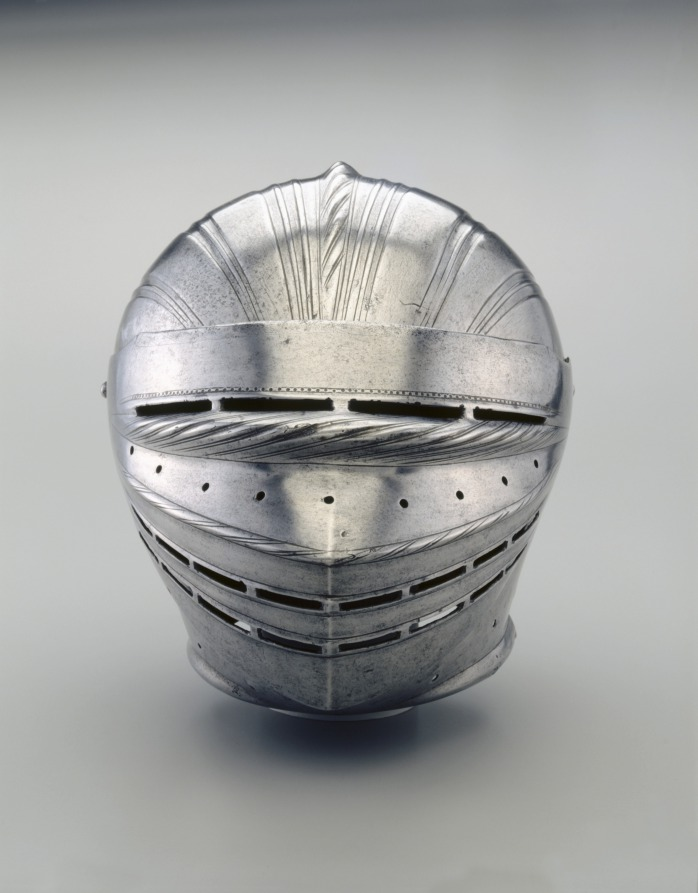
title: Field Armor in Maximilian Style: Helmet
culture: Germany, Augsburg(?), early 16th century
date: c. 1510–15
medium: fluted steel with leather straps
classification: Arms and Armor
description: Most of the elements of this armor were made together, forming a single suit. The lower legs contain some modern restorations. The helmet is believed to be the work of the esteemed Augsburg armorer, Lorenz Helmschmied, who was active at the Hapsburg, Mantua, and Urbino courts between 1467 and his death in 1515.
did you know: This armor was made to mimic the trend of pleated clothing that was popular at the time.